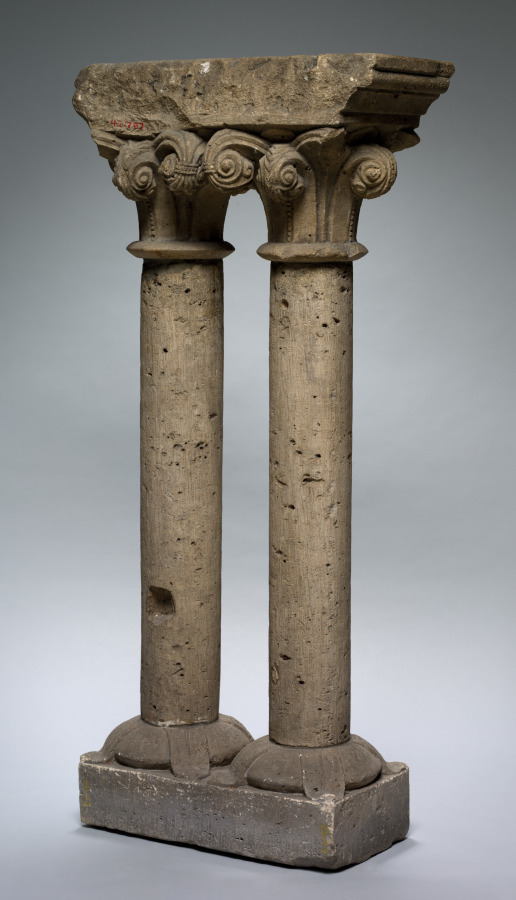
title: Capitals and Columns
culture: France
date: 1200s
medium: stone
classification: Sculpture